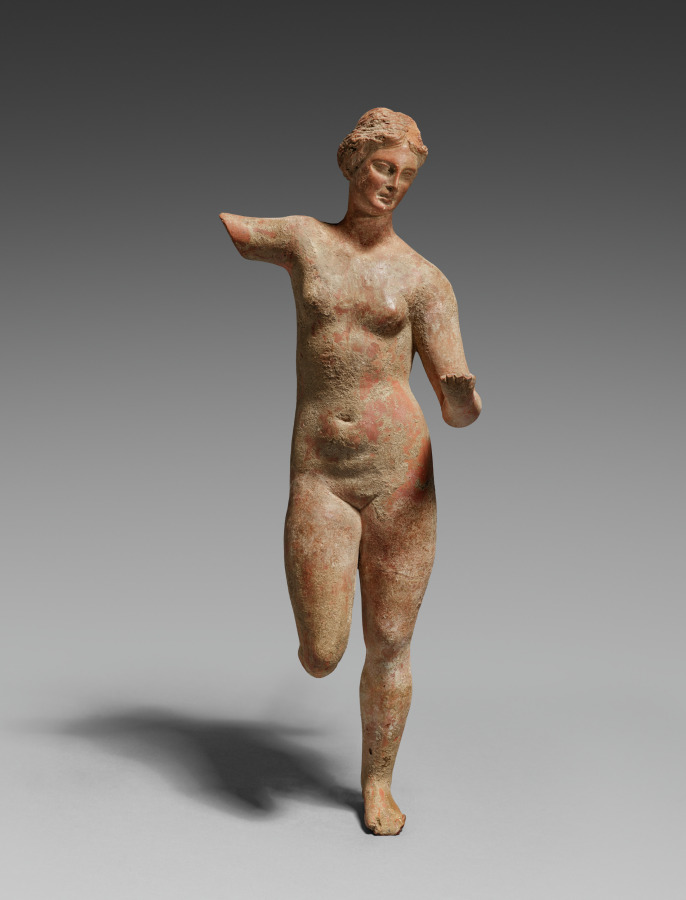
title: Aphrodite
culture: Greece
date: 400–200 BCE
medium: terracotta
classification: Sculpture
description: This nude figurine was likely inspired by the Aphrodite of Knidos by Praxiteles, a work that spawned countless reproductions of varying sizes in different media. Created from inexpensive terra cotta clay, this Aphrodite might have been commissioned as a votive offering by a person of modest means.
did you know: This Aphrodite may be admiring her reflection in a mirror once held in her left hand.